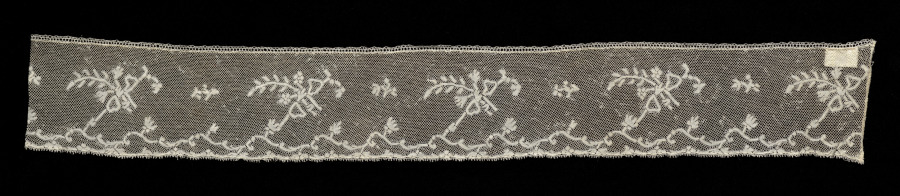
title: Lace Edging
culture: France, Valenciennes or Flanders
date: 1700–1799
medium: Linen: bobbin lace (Valenciennes)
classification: Lace